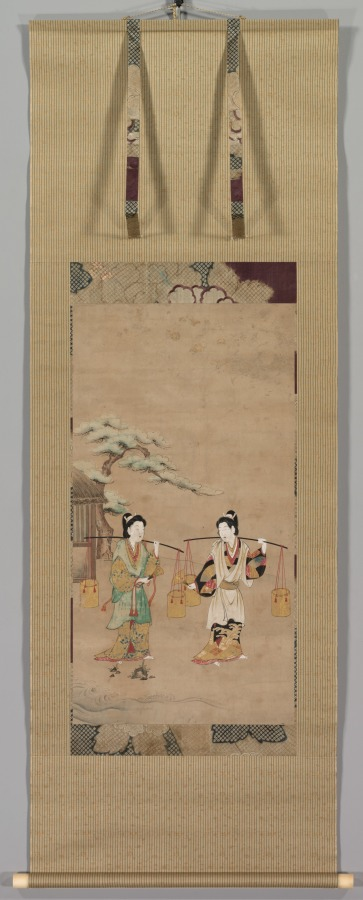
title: Scene from a Noh Play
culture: Japan, Edo period (1615–1868)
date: early 1700s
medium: hanging scroll; ink, color, and gold on paper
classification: Painting